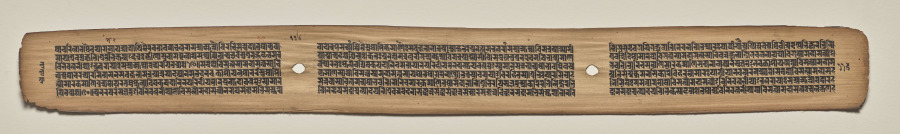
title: Text, Folio 116 (verso), from a Manuscript of the Perfection of Wisdom in Eight Thousand Lines (Ashtasahasrika Prajnaparamita-sutra)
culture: Eastern India, Bihar, Vikramashila Monastery. Painting: Nepal, Kathmandu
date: Sunday, September 14, 1119 (year 239 of the Newar Samvat in the month of Ashvina)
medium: gum tempera and ink on palm leaves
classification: Painting